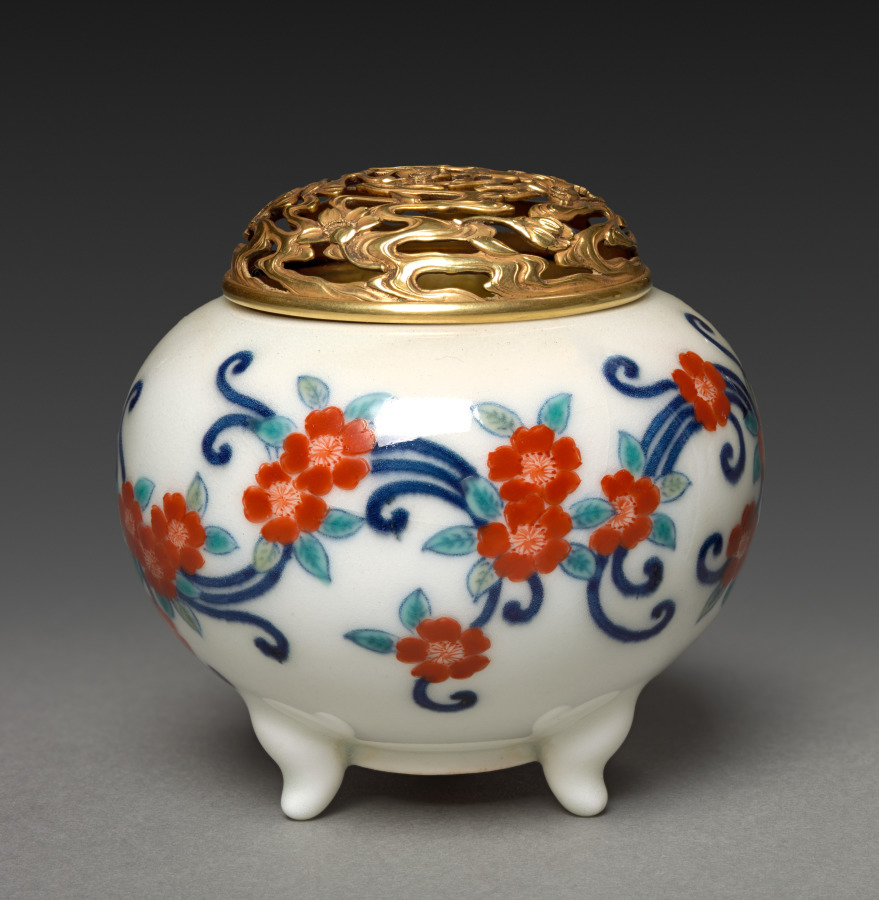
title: Incense Burner with Floral Scroll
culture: Japan, Edo period (1615–1868)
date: early to mid-1800s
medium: Porcelain with underglaze blue and overglaze color enamel (Hizen ware, Nabeshima style)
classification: Ceramic